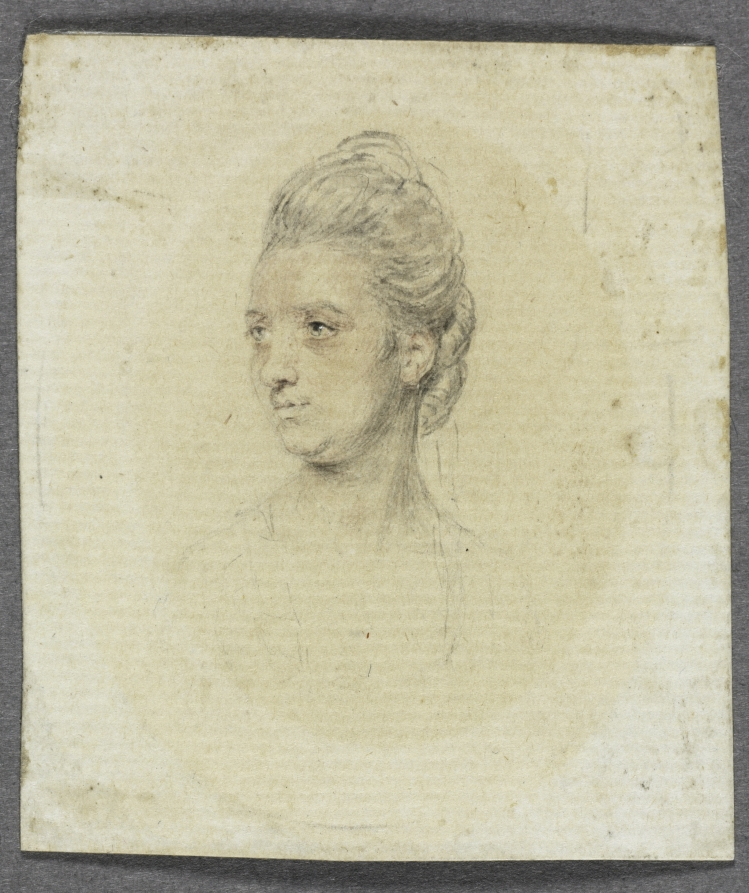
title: Portrait of a Woman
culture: England, 18th century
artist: John I Smart (British, 1741–1811)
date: c. 1772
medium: graphite and wash on laid paper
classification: Portrait Miniature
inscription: inscribed on paper backing: in graphite, upside down at top: 134; in graphite on slant below center: Eleanor of / Spain; on the inside of the outside backing, in center in graphite: M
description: Although it is impossible to say if it was always part of the artist’s process to execute a preparatory sketch prior to painting each miniature, we do know that John Smart retained many hundreds of these sketches. A group of preparatory sketches—of which this portrait is one—descended through the Smirke family after Smart’s daughter Sarah gave a sketchbook containing preparatory portrait studies to her friend Mary Smirke, sister of the celebrated Victorian architect Sydney Smirke. This book was probably broken up around 1877 when it was divided between Sydney’s daughters Mary Jemmett and Mrs. Lange, whose portions were both sold at auction in 1928. This portrait was assigned the historically colorful but fictitious title of “Eleanor of Spain” at some point after memory of its true identity had been lost. Giving illustrious titles to portraits of unknown sitters was a popular strategy adopted by dealers during the nineteenth and twentieth centuries, often applied to miniature portraits and, in particular, to Smart’s sketches of women. The inscription on the paper backing is not in Smart’s hand, and when the paper backing was removed in 1993, no inscriptions were discovered on the back of the drawing itself. Only the sitter’s head and neck are drawn, and a low-necked dress is faintly suggested. Her head is turned to the right, and her light-colored hair is dressed high, with flat curls against the back of her head. She has blue eyes, and the color of her lips is extremely faded, as is the miniature overall. The sitter’s sagging jaw line and the lines beneath her eyes suggest that she was painted as a mature woman. The background is unpainted. A photograph of this sketch in Edward Greene’s notebook indicates that at one time “134” was inscribed on the front in the upper right corner. To this date, the finished ivory for which this preparatory sketch was presumably undertaken has not been discovered. A miniature from the Nelson-Atkins Museum of Art’s Starr collection, while probably not this sketch’s finished ivory counterpart, is closely related in style and date. The Nelson-Atkins unidentified sitter’s veiled hairstyle, position of the head in relation to her squared shoulder, and plump jaw line are identical to the Cleveland sketch. During this stage of Smart’s career, the sitters’ heads were often rather large in relation to their bodies.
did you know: Sketches helped John Smart work out the particulars of a portrait before commencing the miniature on ivory; they were useful in the event that a duplicate might later be required.